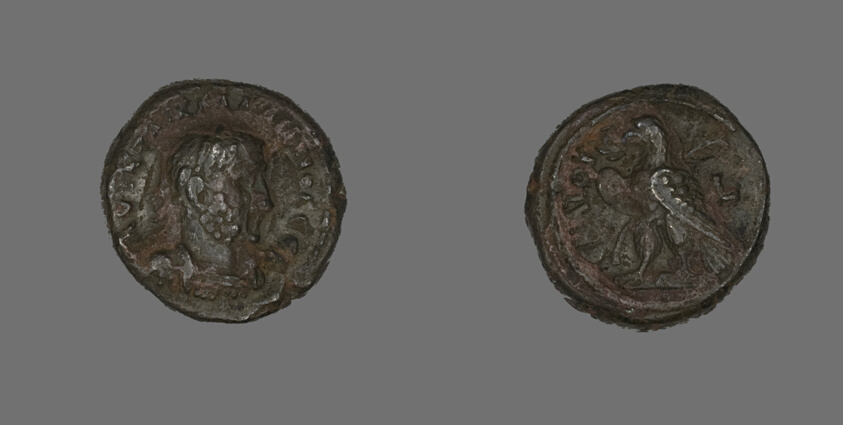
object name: Coin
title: Tetradrachm (Coin) Portraying Emperor Gallienus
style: roman (ancient, style or period), ancient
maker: Roman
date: 253-268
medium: Billon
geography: Roman Empire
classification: coin; ancient art